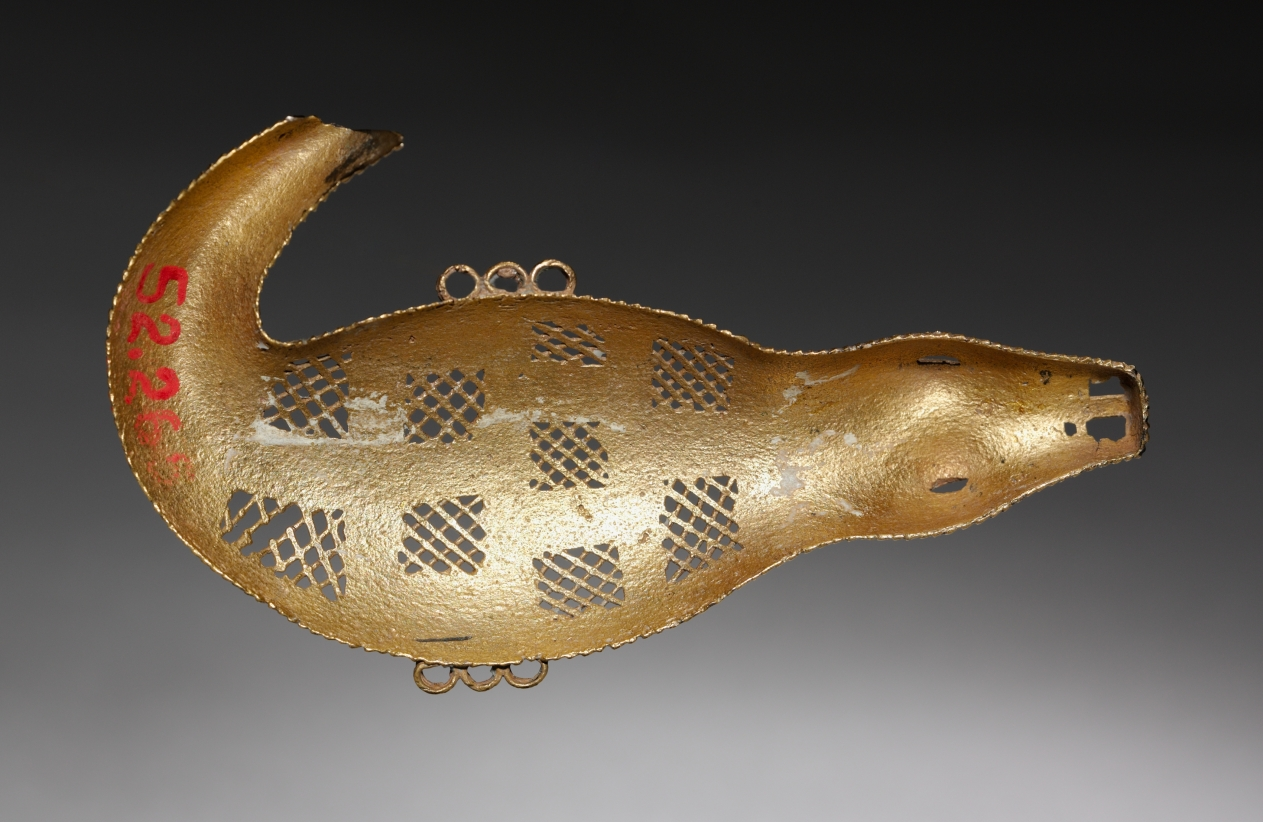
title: Pendant: Crocodile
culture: Africa, West Africa, Côte d'Ivoire, probably Baule-style goldsmith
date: 1930 or earlier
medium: Gold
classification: Jewelry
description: This pendant was cast in gold using the lost-wax method. Gold objects are the only Baule art forms associated with ancestor spirits. Pendants can have many uses. Usually hidden in pots or suitcases, gold adornments can be displayed on important occasions such as funerals. They can be laid out around the corpse before burial. A widow will wear them on a chain around her neck or attached to her hair at the ceremony signaling the end of mourning.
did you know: A goldsmith had to create superfine rolls of wax to make the texture of this piece; the wax was used to make a mold into which liquid gold was poured.